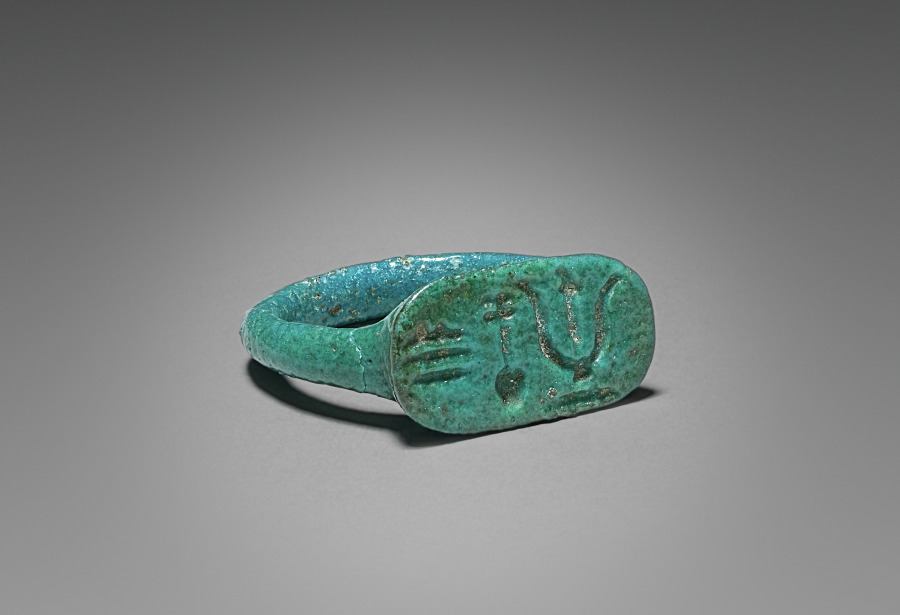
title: New Year's Ring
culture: Egypt, Late period (715–332 BCE), Dynasty 26 or later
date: 664–525 BCE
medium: dark turquoise green faience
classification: Jewelry